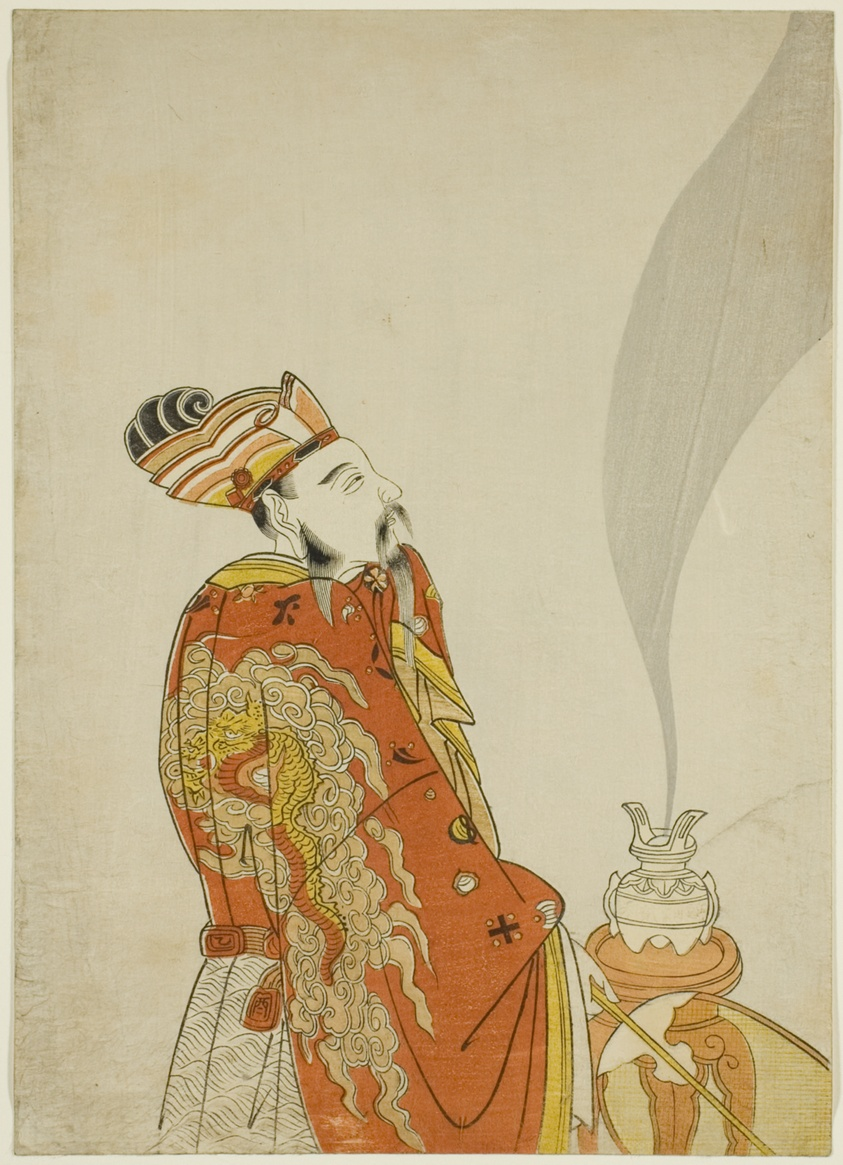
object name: Print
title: Incense That Revives the Image of the Dead - Emperor Wu of the Han Dynasty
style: Japanese (culture or style)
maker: Attributed to Komatsuya Hyakki; Japanese, 1720–1793 (?)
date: 1765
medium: Color woodblock print; left sheet of chuban diptych (right sheet: 1925.2144)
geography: Japan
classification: woodblock print; print; asian art